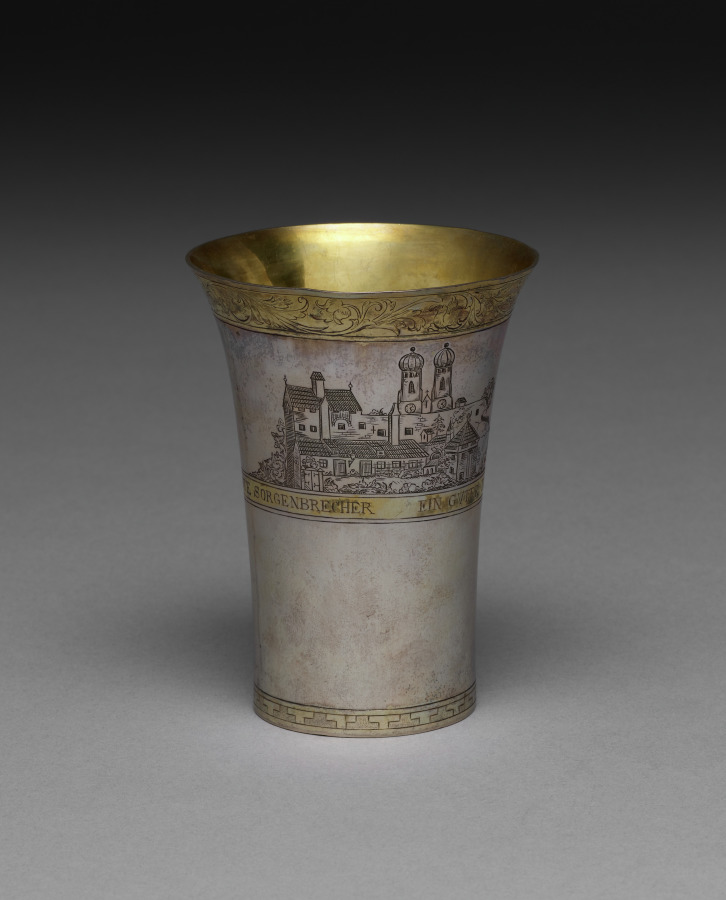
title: Beaker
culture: Germany, Munich, mid-18th century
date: mid 1700s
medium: silver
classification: Silver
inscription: Engraved around side: "EIN GVTER TRVNK AUS VOLLEM BECHER -- DAS IST DER BESTE SORGENBRECHER."